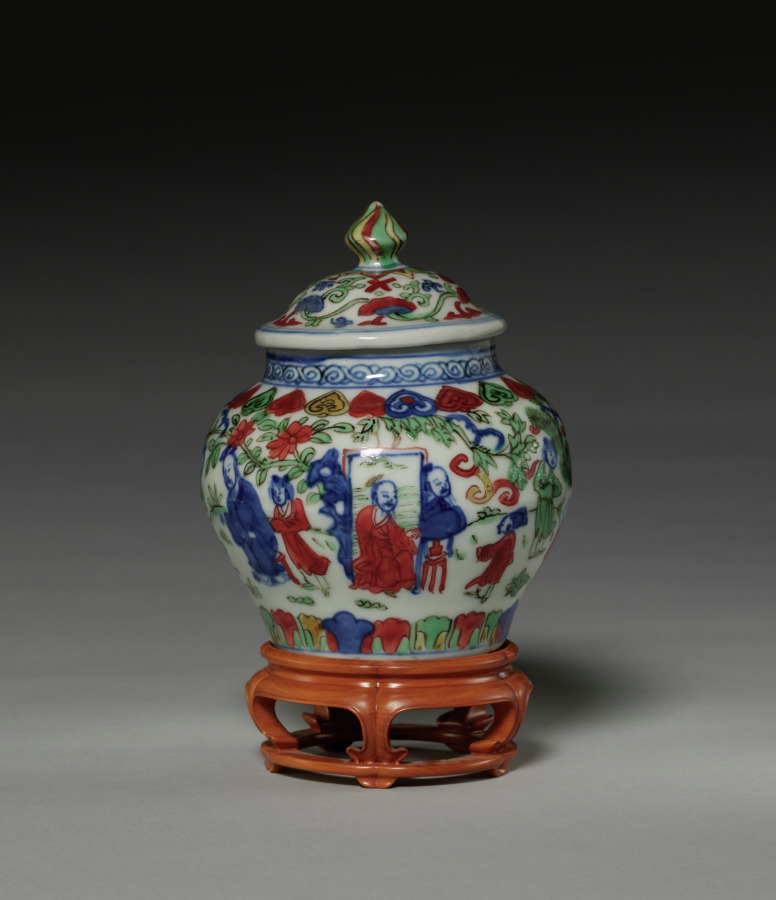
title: Covered Jar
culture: China, Jiangxi province, Jingdezhen kilns, Ming dynasty (1368-1644), Wanli reign (1573-1620)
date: 1573–1620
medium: porcelain with blue underglaze decoration and overglaze enamels in red, green, and yellow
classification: Ceramic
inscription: 大明萬曆年製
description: In the Ming (1368–1644) and Qing (1644–1911) dynasties, luxury items became more affordable to larger parts of the society, including women, merchants, and literati in non-official positions. Imperial patronage and a growing urban population encouraged consumption of luxury goods and local craftmanship. This covered porcelain jar has blue underglaze and overglaze in red, green and blue enamels. It shows Ming dynasty advancements in porcelain decoration and the creative mind of the talented artisans who made it.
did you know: This jar is painted with 16 figures of all ages enjoying a garden setting.